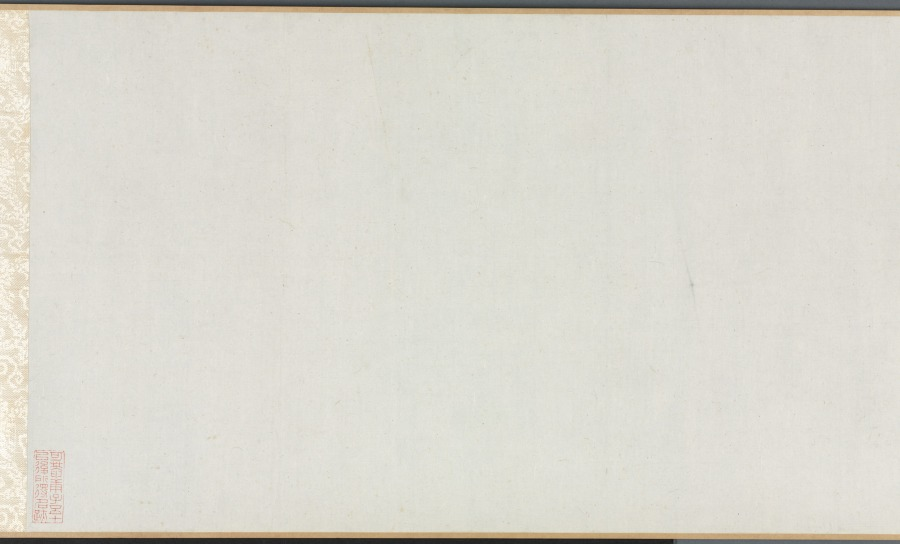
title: Water Village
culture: China, Ming dynasty (1368–1644)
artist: Wen Boren (Chinese, 1502–1575)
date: 1570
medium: handscroll; ink and light color on paper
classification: Painting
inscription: 隆慶庚午秋仿趙文敏筆. 五峰文伯仁 [印] 五峰山人; 文伯仁印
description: In the autumn of 1570, Wen Boren painted this seemingly unemotional scene of low-lying marshlands with a chain of rounded mountains in the background. A fishing boat is nestled on the shore near the village. Although paths and bridges traverse the landscape, only two people are visible in the stillness. From the restrained atmosphere of this landscape, one would never guess that Wen Boren was known as the “bad boy” of the Wu School for his explosive temper. As a younger man, he was even embroiled in a contentious lawsuit with his own uncle, Wen Zhengming (1470–1559), a master of Ming dynasty painting with whom he had trained. The ideal of the scholar-painter, or literati, was that an artist’s moral character is reflected in his paintings, so there was great incongruity between Wen Boren’s difficult personality and his restrained landscapes. A contemporary, Wang Shizhen, wrote this about him: "This gentleman is prone to behave odiously and screamed accusations at people. How is it possible for him to carry in his bosom such a wealth of scenic wonders?" Who knows what effort it took to subdue his fractious spirit to project an image of coolness and refined taste in his paintings?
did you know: A foreground tree has an eccentric twisting silhouette and pepper-dot "halo" of leaves.